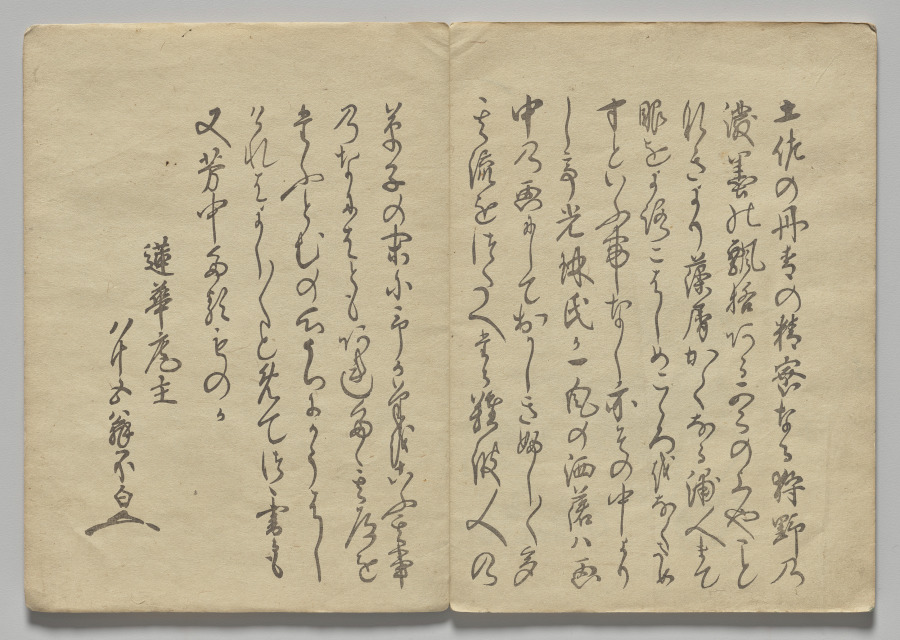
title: Scene from The Kōrin Picture Book (Volume 1)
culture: Japan, Edo period (1615–1868)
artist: Nakamura Hōchū (Japanese, d. 1819)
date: 1800s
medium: color woodblock printed book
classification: Bound Volume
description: Ogata Korin (1658-1716) was one of the most admired artists of Rimpa, or "decorative school painting." These books by the charming later-generation Rimpa artist Hochu record Korin's inventive designs.